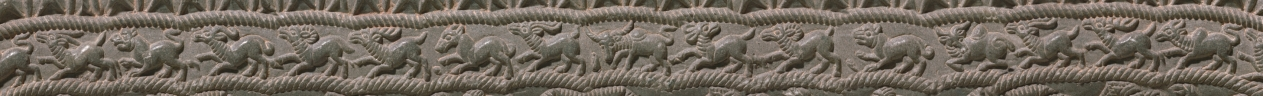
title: Ringstone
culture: India, Maurya period (322–185 BCE)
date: 200s BCE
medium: steatite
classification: Sculpture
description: Ringstones are among the earliest works of art to be created in stone during India's historical period. This example is finely carved with detailed images of affectionate couples and palm trees, running animals, and geometric motifs in concentric circles. The function of ringstones remains uncertain, since none of the surviving examples is inscribed or explained in a text.